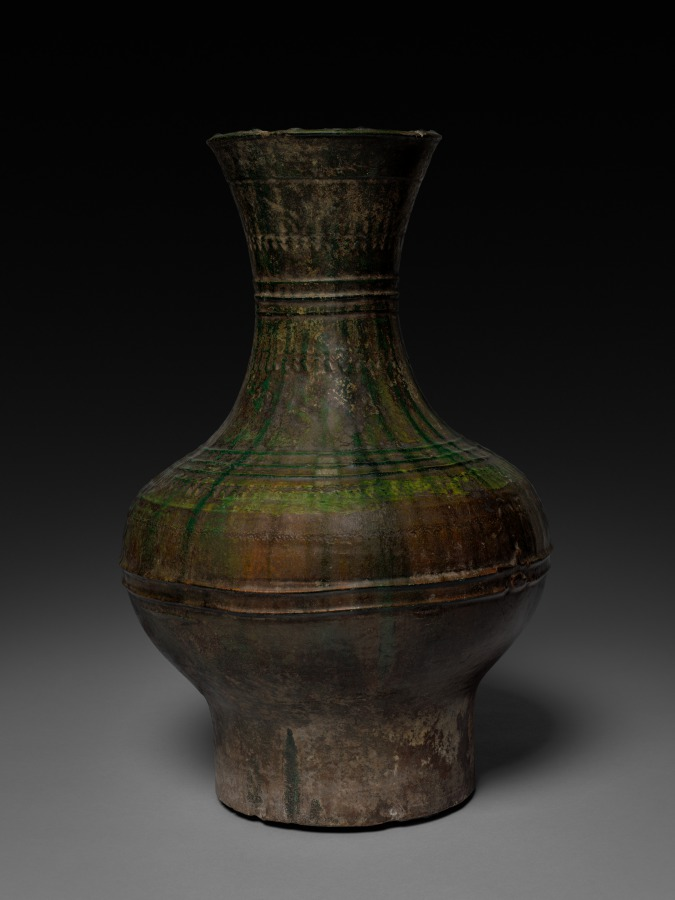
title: Jar (Hu)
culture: China, Han dynasty (202 BCE–220 CE)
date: 206 BCE–220 CE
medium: earthenware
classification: Ceramic